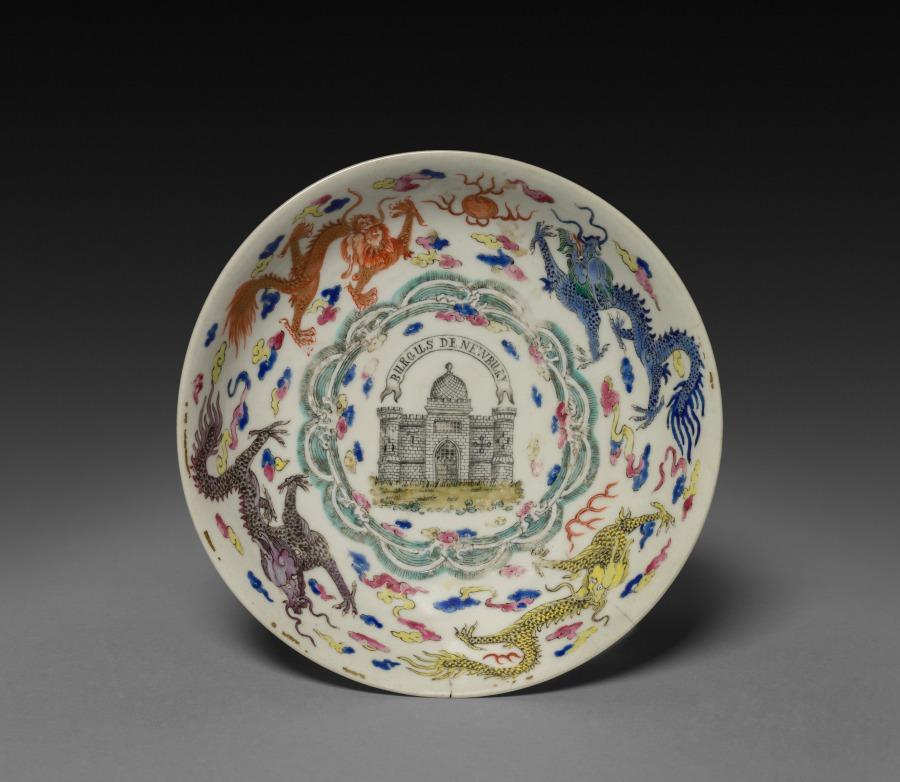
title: Saucer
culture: China, Chinese Export, 18th century, Period of Kien Lung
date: c. 1750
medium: porcelain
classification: Ceramic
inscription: in a curved band above the castle: "Burgus De Newbury."